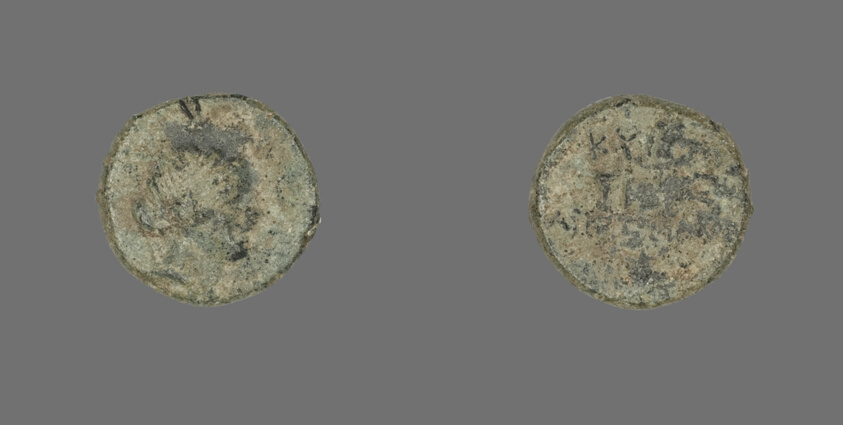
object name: Coin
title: Coin Depicting the Amazon Cyme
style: greek, ancient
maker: Greek, minted in Cyme, Acolis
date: about 250 BCE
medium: Bronze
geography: Ancient Greece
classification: coin; ancient art